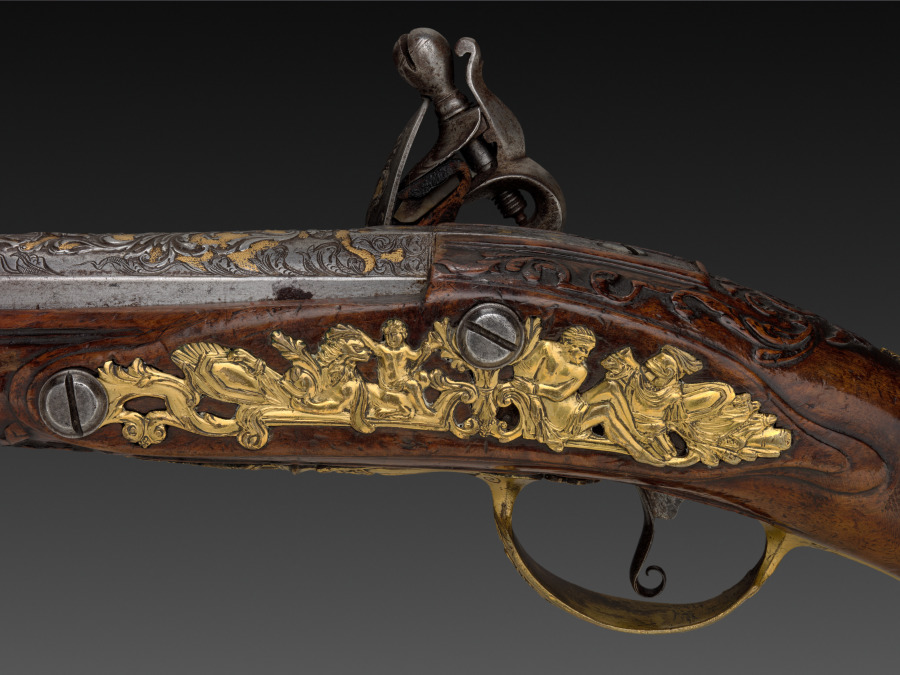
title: Flintlock Pistol (2 of 2)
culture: Franco-Flemish, Liège, early 18th Century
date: early 1700s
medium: steel with gold inlay, gilt-brass mounts; walnut burl stock; chiseled high-relief decoration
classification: Arms and Armor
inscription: on barrel: G. MASSIN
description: The barrel of this pistol is signed G. MASSIN, a gunsmith apparently working in eastern France or French-speaking Flanders, possibly the city of Liège. The exquisite ornament along the breech of the barrel is chiseled and engraved. The gilded lock-plate and mounts may be compared to the finest contemporary work in other media, such as furniture with ormolu mounts.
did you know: The flintlock ignition system was developed in the 1600s and remained the dominant system until the early 1800s.